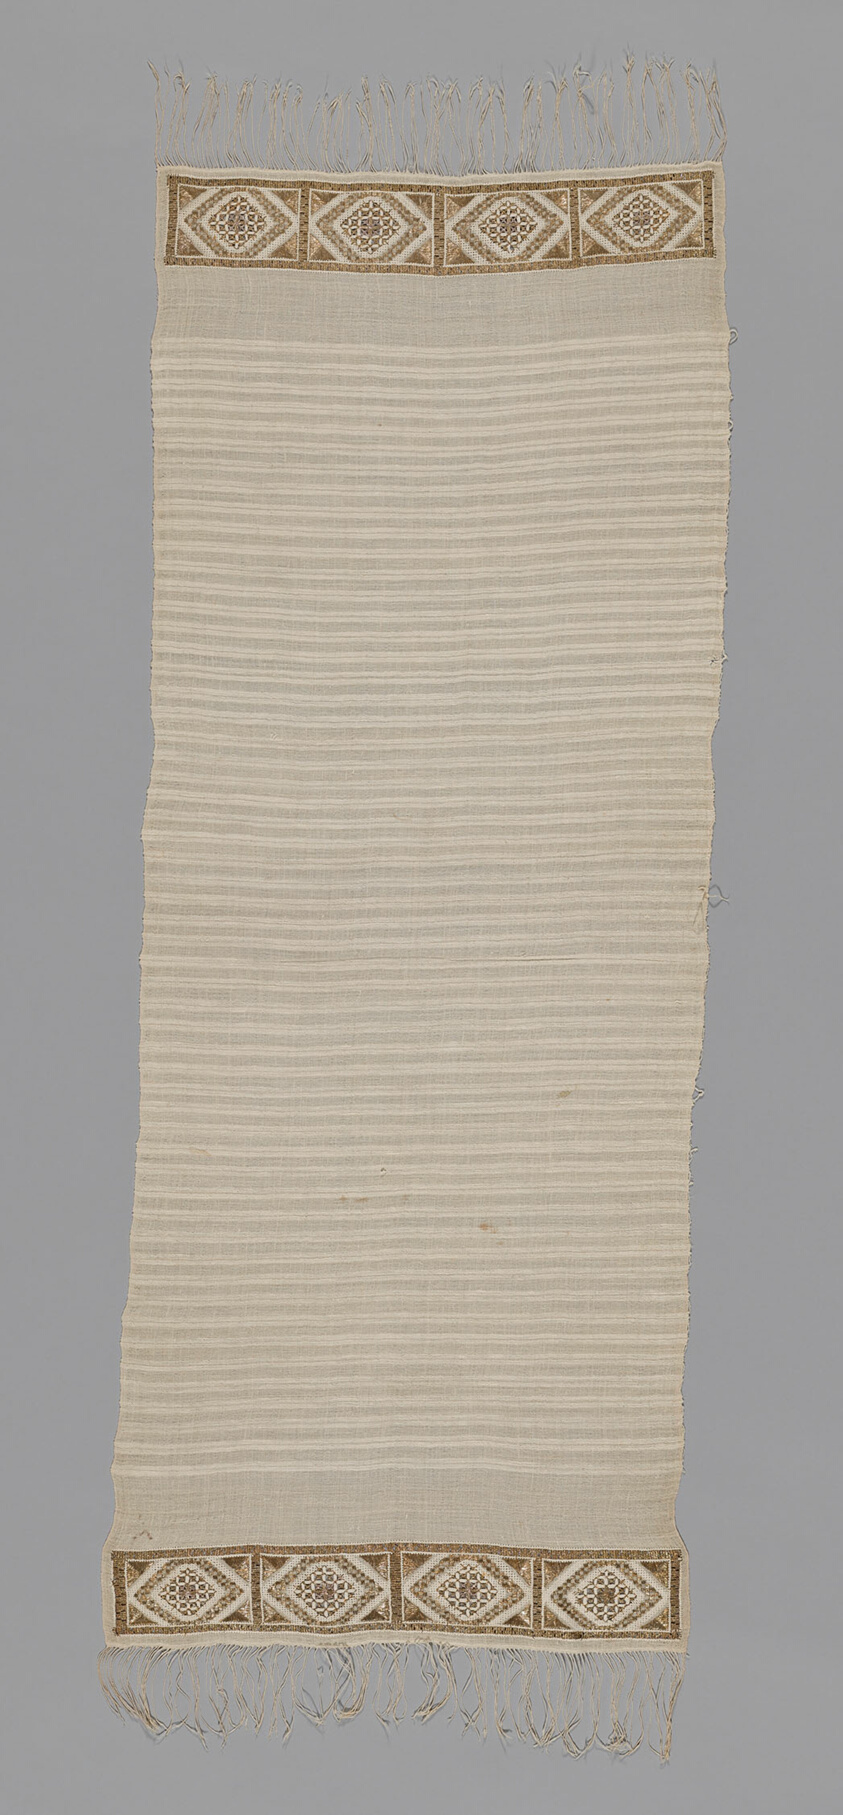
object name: Textile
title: Towel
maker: Turkey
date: 18th/19th century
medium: Embroidered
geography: Turkey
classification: textile; needlework (visual works); weaving